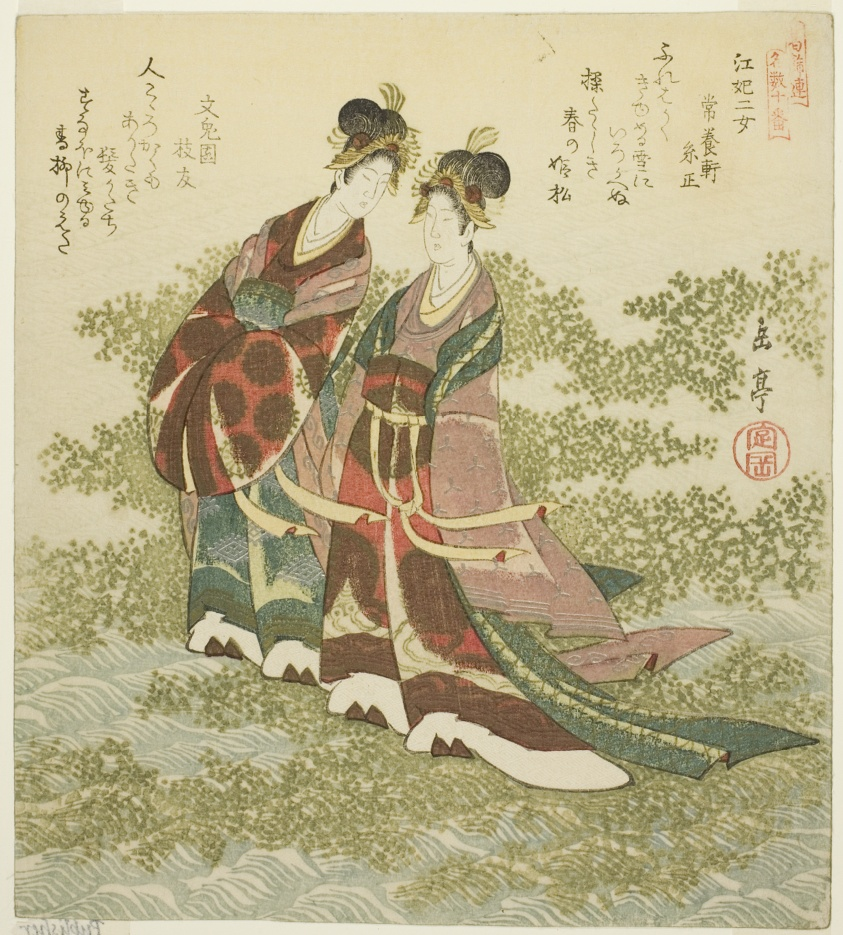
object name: Print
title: Two Princesses of the River (Kohi nijo), from the series "A Set of Ten Famous Numbers for the Katsushika Circle (Katsushikaren meisu juban)"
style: Japanese (culture or style)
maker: Yashima Gakutei (Japanese, 1786 (?)-1868)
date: c. 1828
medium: Color woodblock print; shikishiban, surimono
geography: Japan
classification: woodblock print; print; asian art